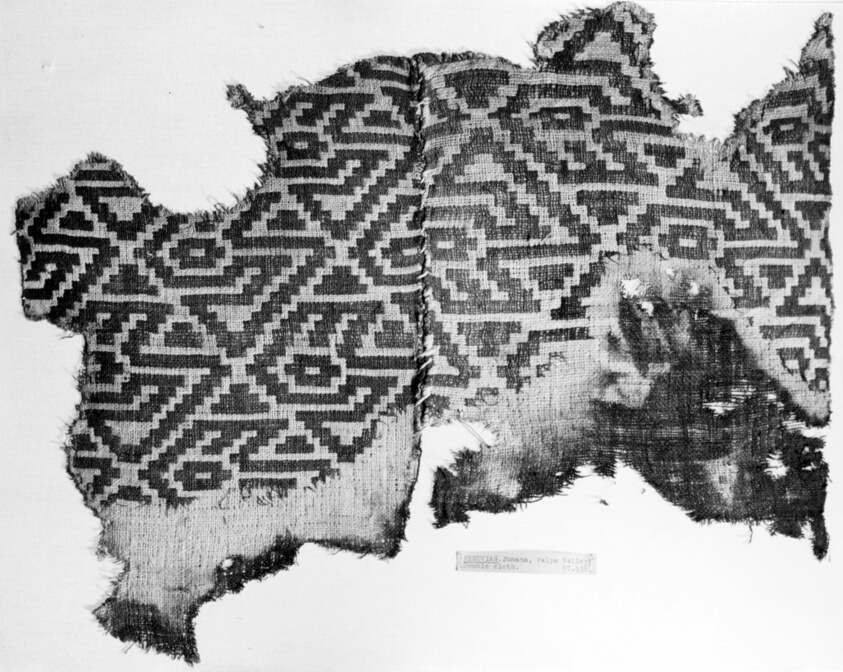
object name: Textile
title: Fragment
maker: Peru, south coast, Palpa Valley, Jumana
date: A.D. 1000/1476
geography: Peru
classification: textile; weaving